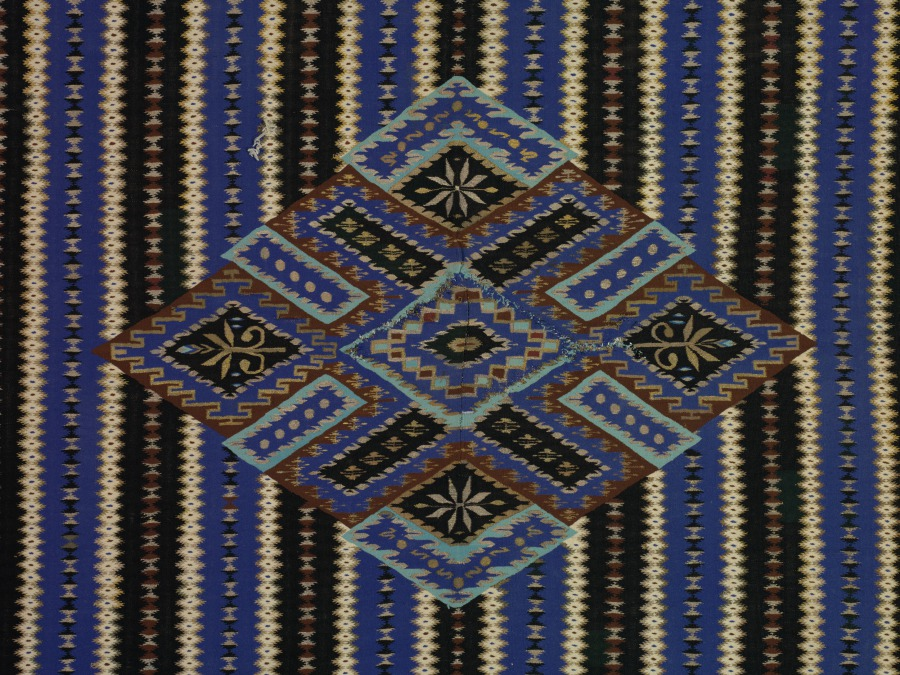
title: Sarape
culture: America, Native North American, Southwest, Mexico, Saltillo, Post-Contact, Early Period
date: c. 1890–1900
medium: tapestry weave: cotton and wool and metal thread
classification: Textile